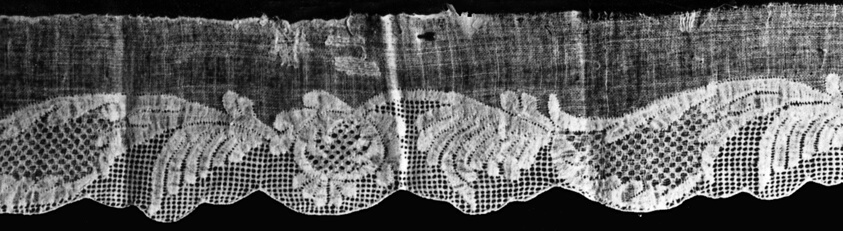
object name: Textile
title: Edge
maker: France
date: 19th century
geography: France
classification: textile; needlework (visual works)